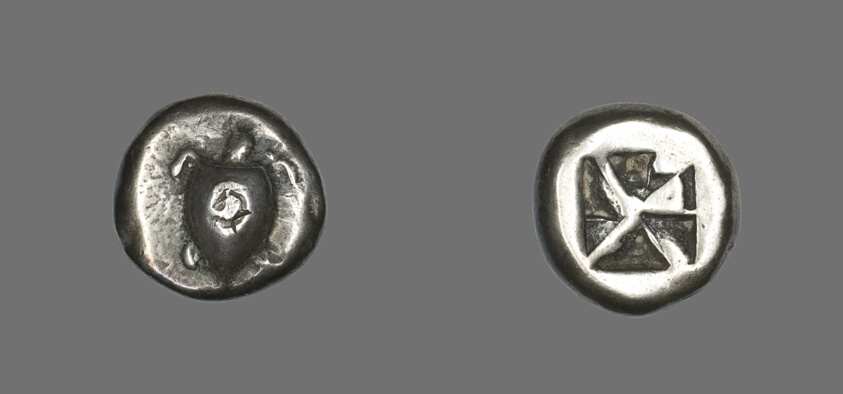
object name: Coin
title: Stater (Coin) Depicting a Sea Turtle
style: archaic (greek), ancient, greek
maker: Greek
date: 650-600 BCE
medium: Silver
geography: Greece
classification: coin; ancient art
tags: turtle